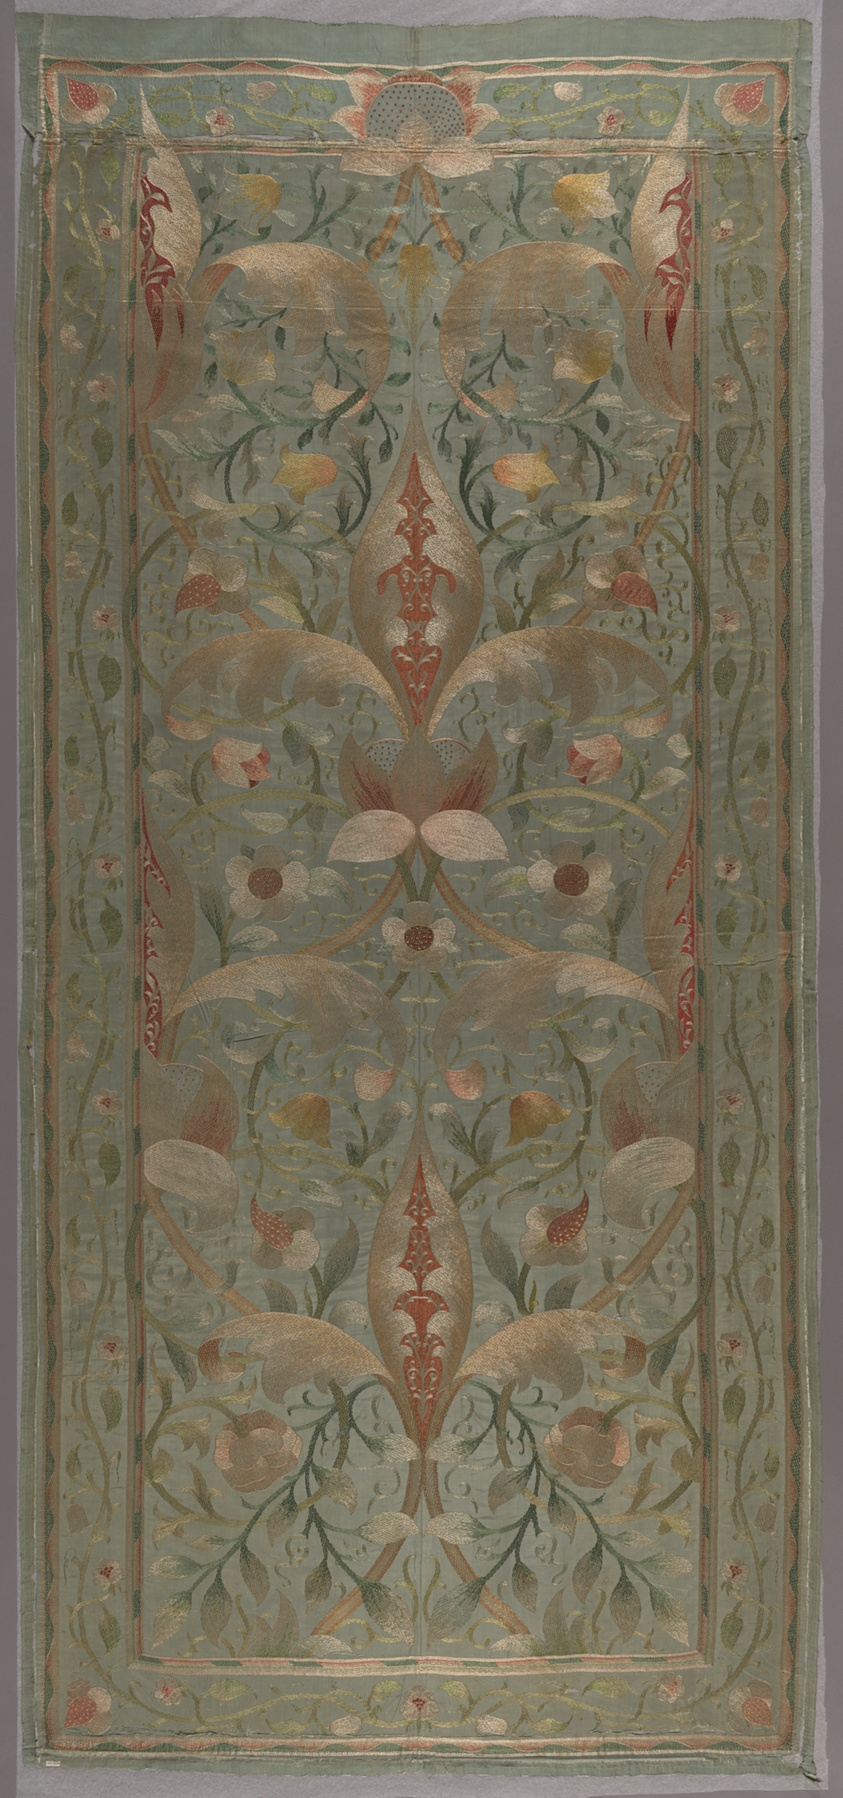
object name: Textile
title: Lotus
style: Arts and Crafts Movement, british, 19th century, British Arts and Crafts Movement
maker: Design attributed to May Morris (English, 1862–1938); Produced by Morris & Co., London (English, 1875–1940); Embroidered by the Decorative Arts Society, Chicago (American, founded 1877)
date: Design by 1888, made 1888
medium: Silk, warp-float faced twill weave; embroidered in satin and stem stitches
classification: textile; needlework (visual works)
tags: floral, lotus